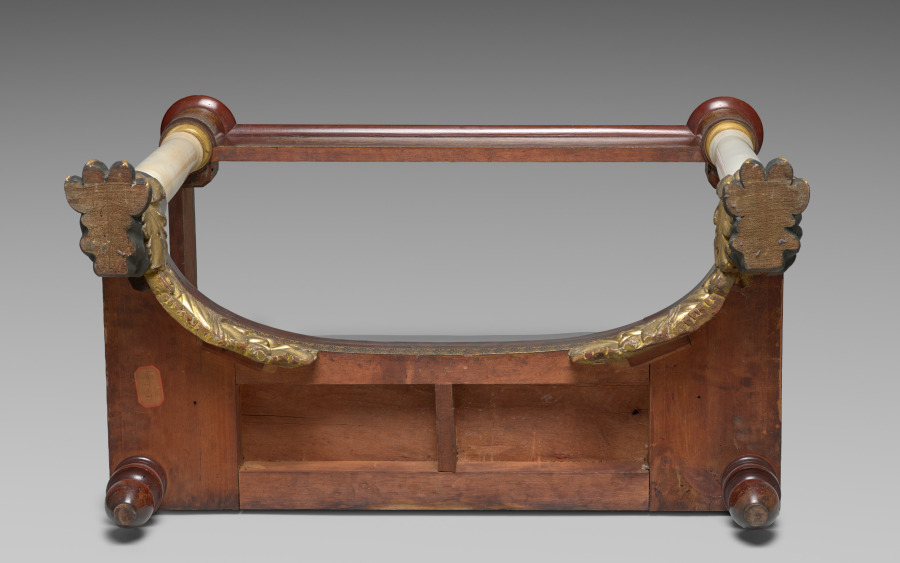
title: Pier Table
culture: America, New York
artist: Joseph Meeks and Sons (American)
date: c. 1829–35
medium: mahogany; marble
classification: Furniture and woodwork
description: Ornamental tables such as this marble-topped example were most often used in rooms on a narrow wall between two windows or just across from them on an opposite wall. Usually a gilded mirror hung above the table to create a single pier of glass, top to bottom, which reflected light around the room. This table’s bold use of carved and stenciled decoration, as well as expensive white marble, indicate that it was owned by a very wealthy family.